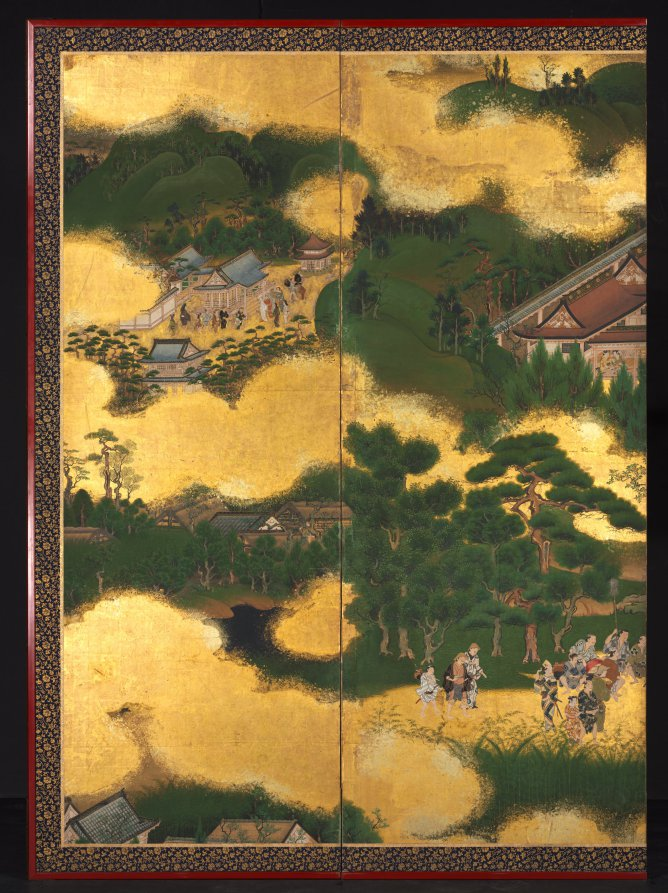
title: Horse Race at the Kamo Shrine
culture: Japan, Edo period (1615–1868)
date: early to mid-1600s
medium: One of a pair of six-panel folding screens; ink and color on gilded paper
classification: Painting